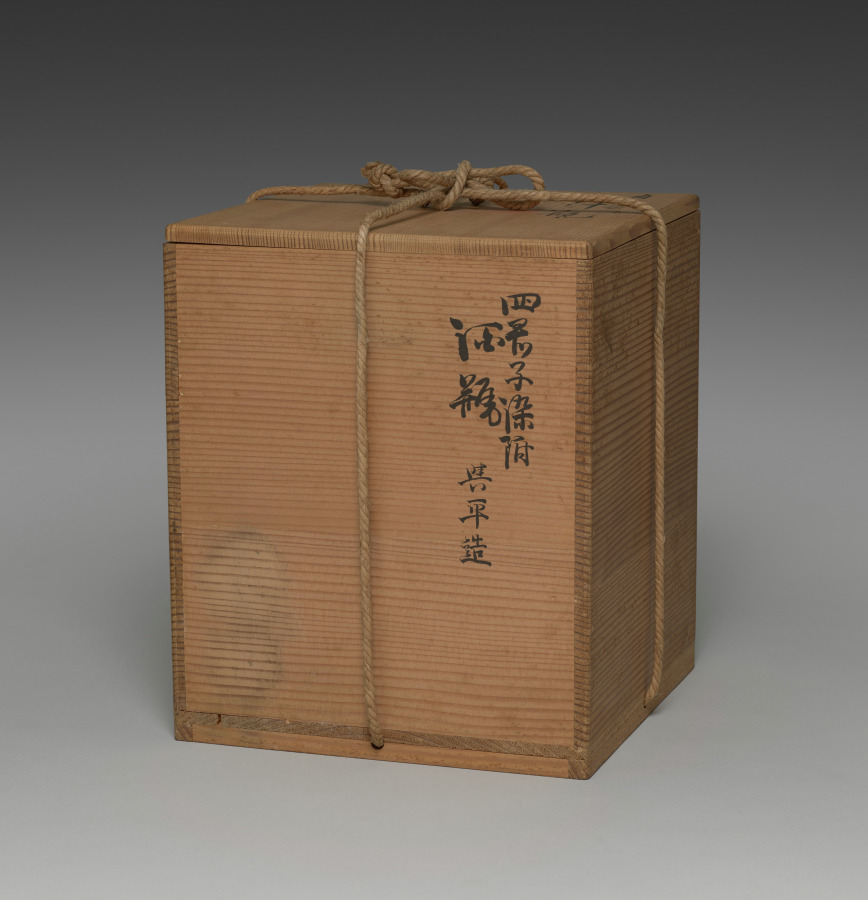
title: Sake Pourer with Chrysanthemum, Orchid, and Plum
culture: Japan, Meiji period (1868–1912)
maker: Seifū Yohei III (Japanese, 1851–1914)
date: c. 1887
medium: Porcelain with underglaze blue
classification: Ceramic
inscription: Artist's signature in underglaze blue on the base.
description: Seifū Yohei II and his successor, Seifū Yohei III, trained in ink painting. Their brush skills are seen in their underglaze cobalt blue designs. Orchid, bamboo, chrysanthemum, and plum, appearing on Yohei III’s sake pourer, are known as the Four Gentlemen. They symbolize the virtues of humility, integrity, endurance, and perseverance.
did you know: This sake pourer is decorated with the Chinese theme of the Four Nobles, in which the qualities of a good person are represented by plant.